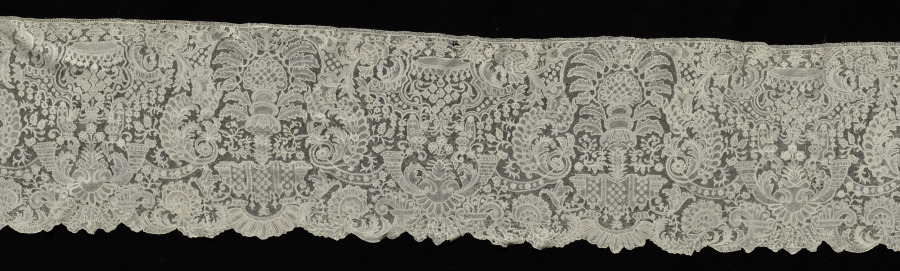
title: Lace Flounce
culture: Belgium, Brussels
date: early 1700s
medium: Bobbin lace (Point d'Angleterre)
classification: Lace